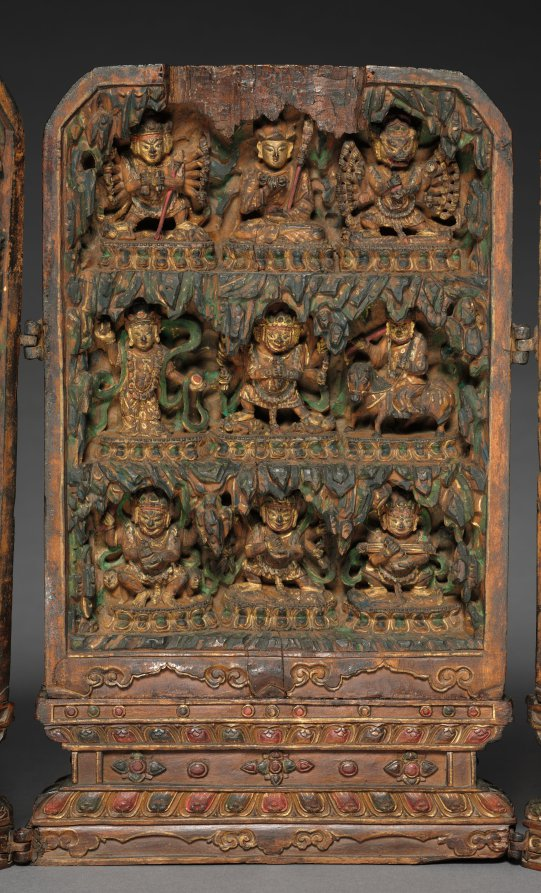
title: Portable Shrine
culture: Tibet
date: c. 1500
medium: wood with mineral pigments and metal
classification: Sculpture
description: Carved from a solid section of a log, the shrine contains images of protectors of tantric Buddhism—a branch that developed in northern India and became prominent in the Himalayas by the 700s. The central figure in the top row is Padmasambhava (Indian, active in Tibet in the 740s), venerated as the founder of one of the four main Tibetan monastic orders. Incised on the exterior are images of protectors, mantras written in Tibetan script, and a sacred funerary monument called a stupa. Tantric practice emphasizes recitation of mantras that invoke the powers of compassion, wisdom, and protection.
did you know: Tantric practice can be performed alone in any location; this shrine could be used by a traveling practitioner for meditation, visualization, prayer, and recitation of mantras.